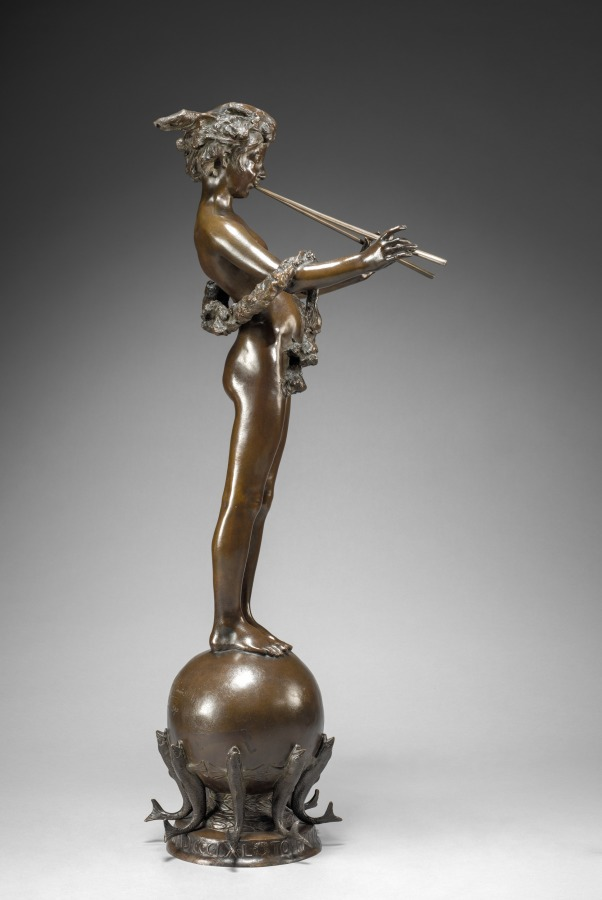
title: Pan of Rohallion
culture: America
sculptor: Frederick William MacMonnies (American, 1863–1937)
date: 1890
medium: bronze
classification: Sculpture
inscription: Signed on globe: Frederick MacMonnies, Paris 1890. © 1894. Inscribed around base: TO PAN OF ROHALLION ANNO DOMINI MDCCCLXL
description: Rohallion in the title refers to the name of an estate in New Jersey, whose owner commissioned MacMonnies to create a large fountain of this design for a garden pool. Later, the artist made several smaller versions, such as this example. Here, the ancient Greek god Pan plays his musical pipes while standing on an orb supported by fish.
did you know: The character of Peter Pan, including his flute playing, references the Greek god Pan.